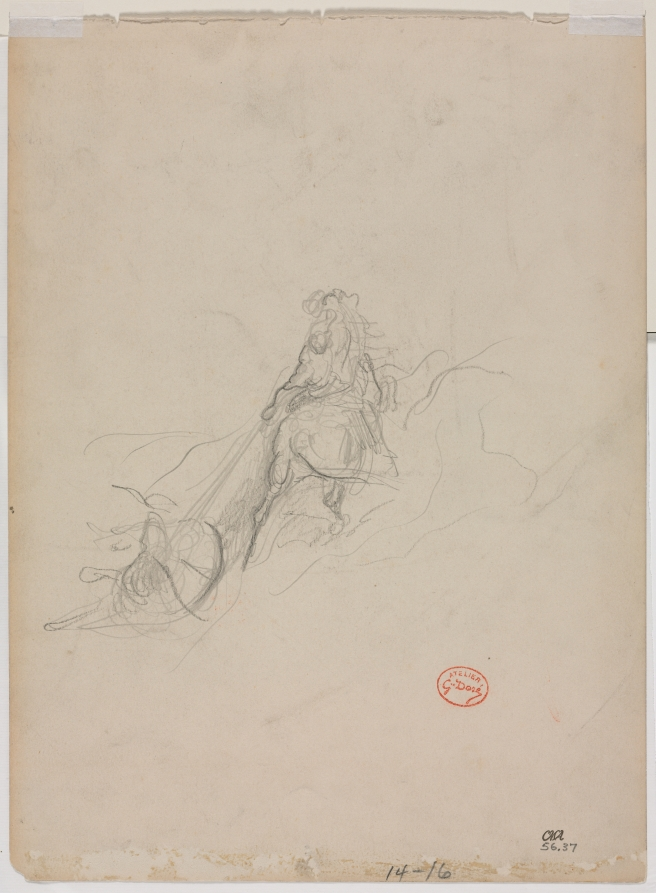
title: Sketch of Hunting Scene (verso)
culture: France, 19th century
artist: Gustave Doré (French, 1832–1883)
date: c. 1868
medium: graphite and black crayon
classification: Drawing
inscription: lower right, in graphite: 14-16